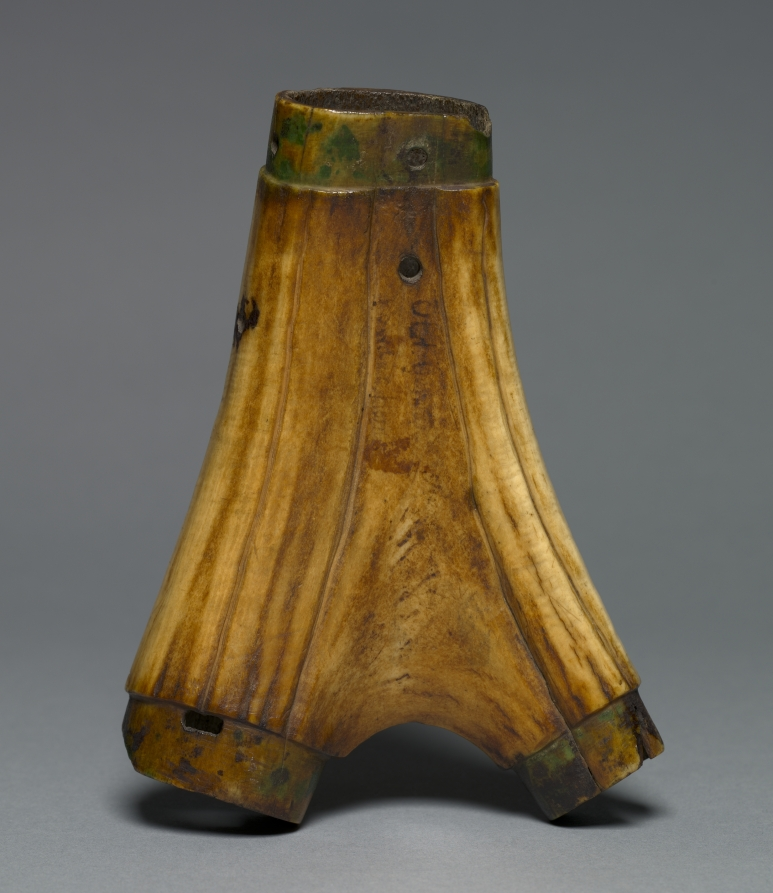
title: Powder Flask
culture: Austria (?) or Germany, 16th century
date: c. 1550–1580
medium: staghorn (two branches) with carved relief scene of the Judgement of Paris, mounts missing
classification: Arms and Armor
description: Powder flasks are small, portable containers designed to hold gunpowder. From the 1400s to the 1800s, powder flasks were indispensable for charging and priming firearms of all types. Without powder flasks firearms were of little use to their owners. Many highly decorated flasks rank as works of art. During the 1500s, they were frequently decorated with images of famous historical figures. Here the figures of the Judgment of Paris come from Greek antiquity.